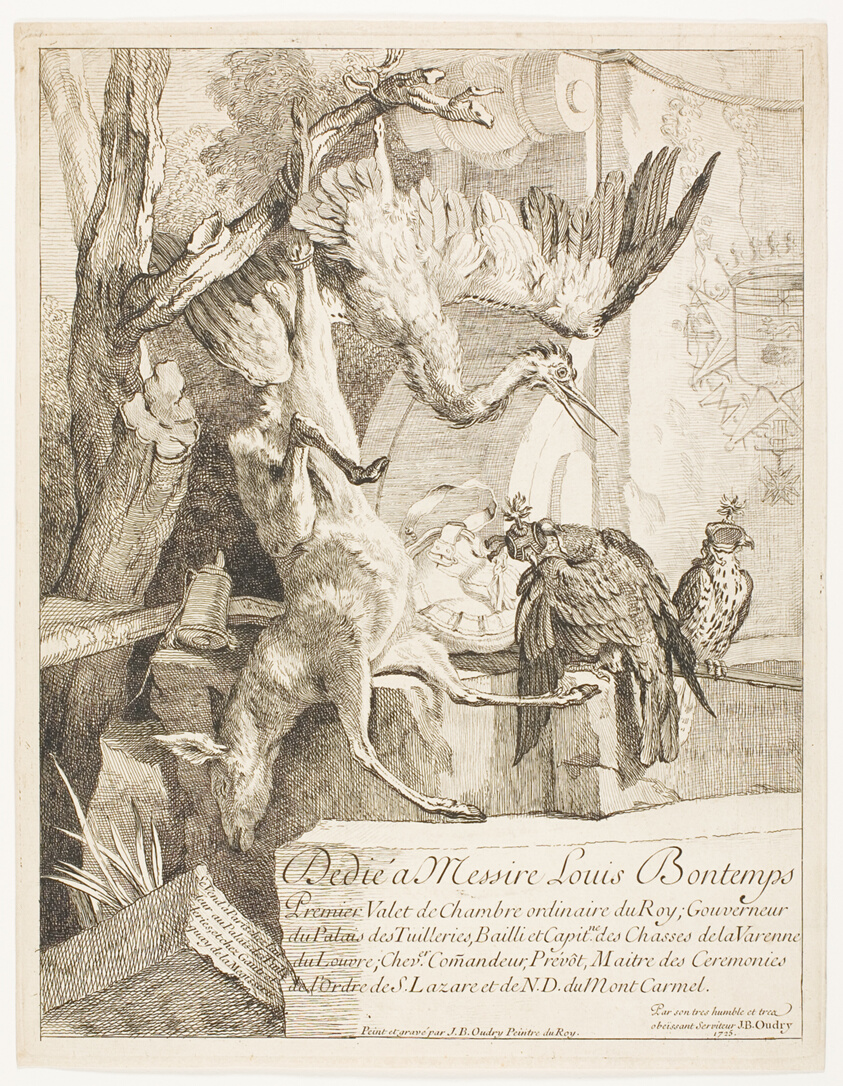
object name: Print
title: Four Hunting Subjects, No. 1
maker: Jean-Baptiste Oudry (French, 1686-1755)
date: 1725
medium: Etching on paper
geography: France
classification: etching; print; prints and drawing